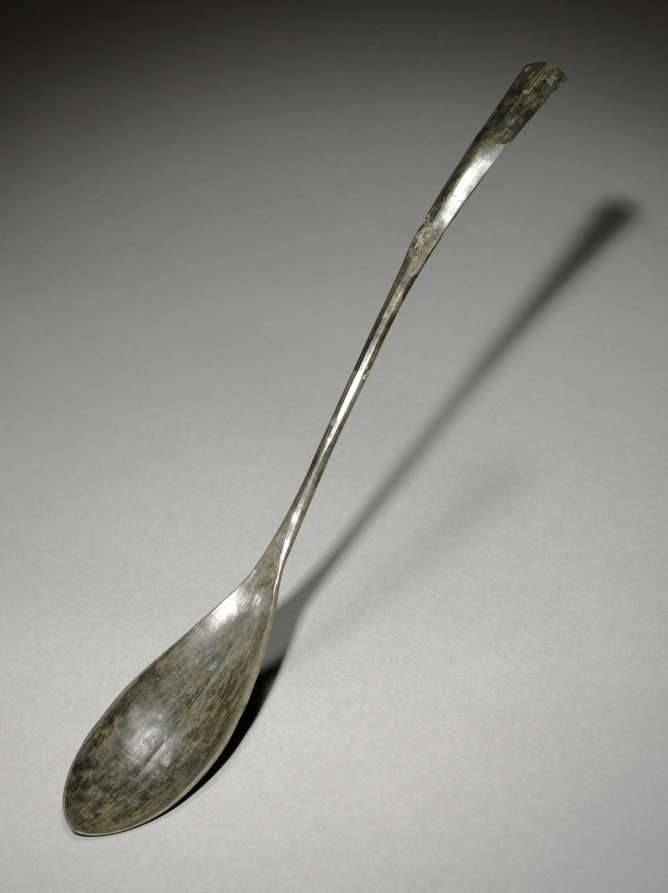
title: Spoon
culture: Korea, Goryeo dynasty (918–1392)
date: 918–1392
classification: Metalwork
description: Celadons, spoons, seals, and bronze mirrors were the most common burial objects in tombs during the Goryeo period (918–1392). Furnishing tombs with an elaborate assemblage of objects was believed to honor and comfort the newly dead. Generally, Goryeo tombs were left untouched until the late 19th century. During the colonial period (1910–45), however, Japanese archaeologists hastily excavated the tombs located in Kaeseong, the former capital of the Goryeo period.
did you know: Bronze spoons are the most common burial item. The shape of the spoon suggests it was used for tea.